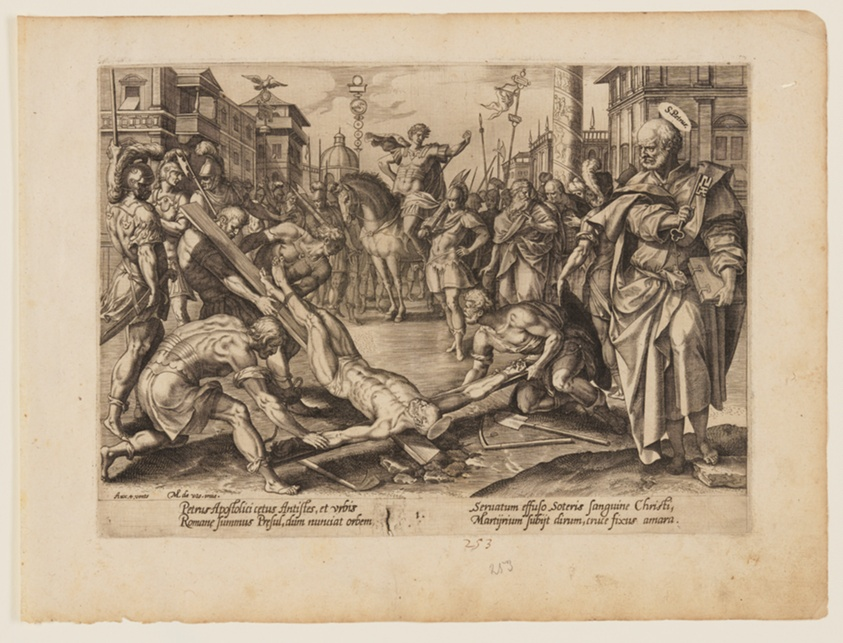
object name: Print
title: The Martyrdom of St Peter, from The Martyrdom of Christ and the Apostles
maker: Hendrick Goltzius (Dutch, 1558–1617); after Maarten de Vos (Flemish, 1532–1603); published Hieronymus Cock (Netherlandish, c. 1510–1570)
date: c. 1578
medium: Engraving on ivory laid paper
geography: Netherlands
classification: engraving; paper; print; prints and drawing